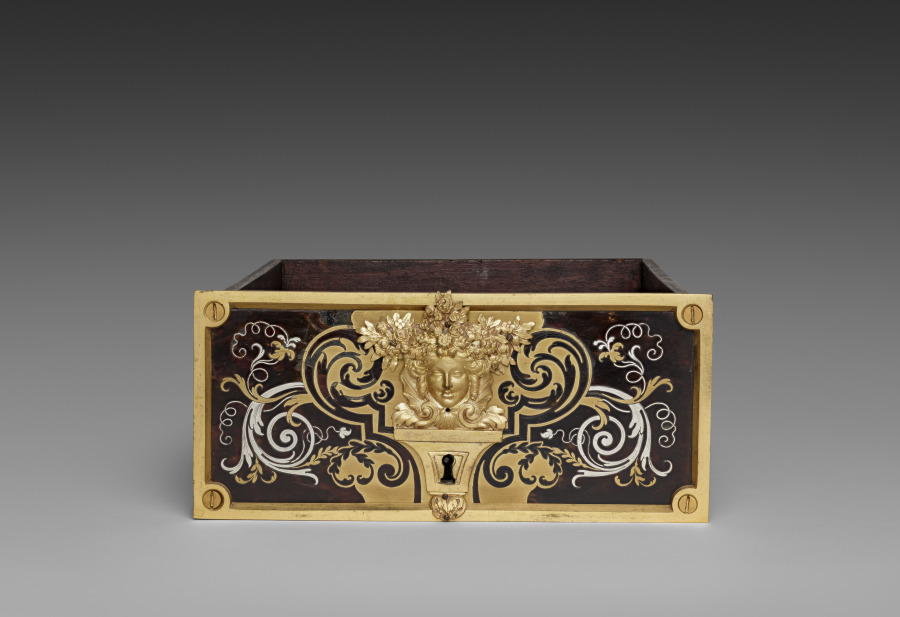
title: Side Drawer for Cabinet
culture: France, late 17th Century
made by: André-Charles Boulle (French, 1642–1732)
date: c. 1690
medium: ebony, marquetry in metal and tortoise shell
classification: Furniture and woodwork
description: Appointed cabinetmaker to King Louis XIV in 1672, André-Charles Boulle became a master of furniture making in France during the late 1600s until his death in 1732. Known primarily for his use of marquetry, in which metal patterns are inlaid into tortoiseshell then applied within the veneered surface of the furniture, Boulle established a level of quality and craftsmanship few others could achieve. As a result, his work found favor at the royal court and among other aristocrats and diplomats eager to impress the king. The inclusion of a medallion depicting Louis XIV within the bronze decoration of this chest would have identified the owner with the royal court. Often exhibiting stout architectural proportions with elegant groups of inlaid motifs such as the parrot on the central panel of this chest, Boulle’s designs are an example of the intellectual fashion for contrasting ideas, materials, and motifs.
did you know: Originally designed to sit atop an elaborate tall stand, this chest was likely altered in the late 1700s to reduce its scale and height.